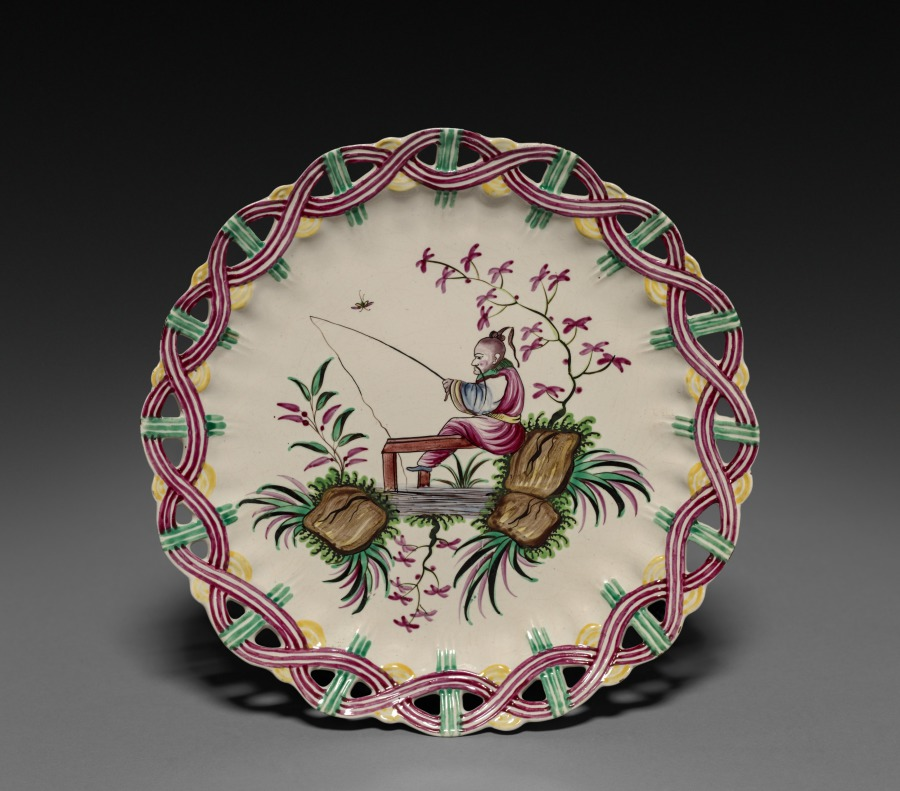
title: Plate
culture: France, Lunéville, 18th century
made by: Lunéville Factory (French)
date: 1775–1780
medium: faience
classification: Ceramic